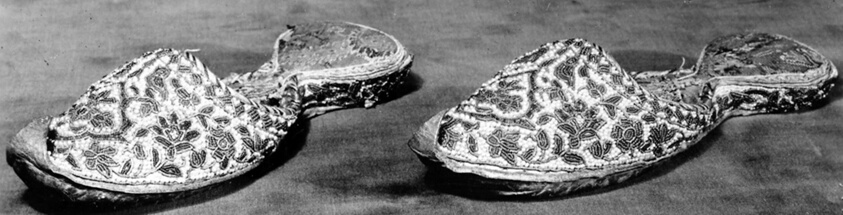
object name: Textile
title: Slippers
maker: India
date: 19th century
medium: Embroidered in colored beads; seed pearls and couched gold cords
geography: India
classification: textile; shoes - needlework; costume accessory - shoe; costume; dress (garment); clothing